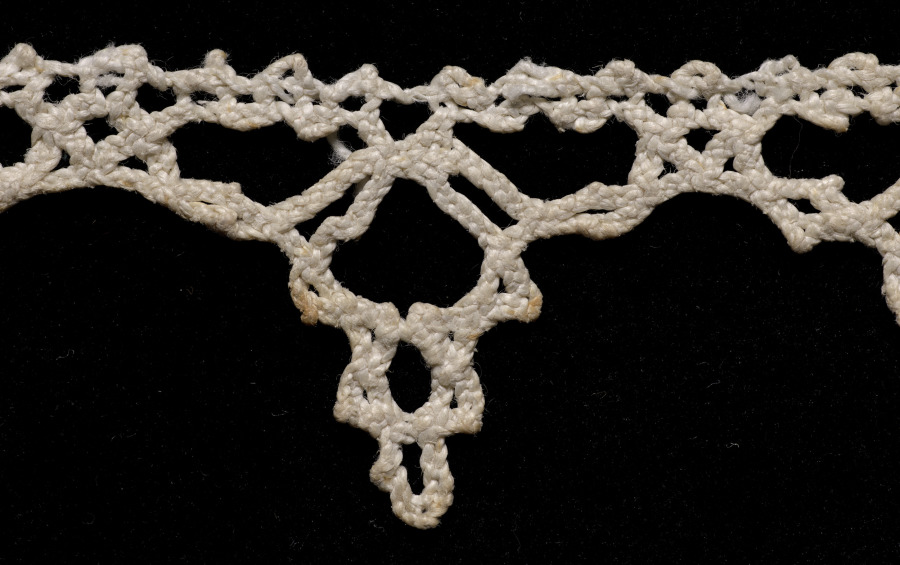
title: Lace Edging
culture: Italy, Venice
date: 1540–60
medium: Bobbin lace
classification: Lace